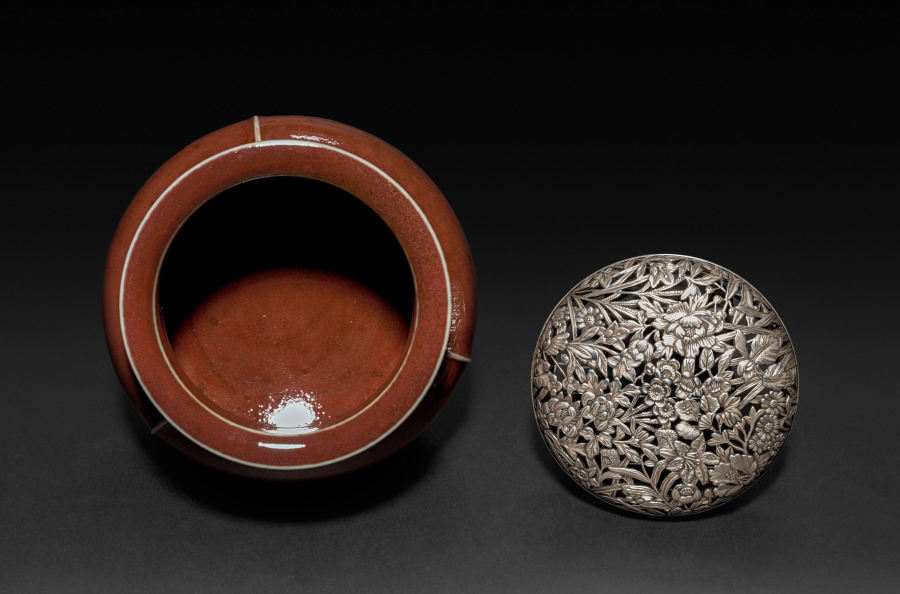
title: Incense Burner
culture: Japan, Meiji period (1868–1912)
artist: Seifū Yohei III (Japanese, 1851–1914)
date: 1893–97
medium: Porcelain with molded design, crimson glaze, and floral openwork silver lid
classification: Ceramic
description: Seifū Yohei III made incense burners in a wide variety of designs and styles. Their silver lids were produced outside the studio by metalwork specialists. This tripod incense burner has a distinctive red-colored glaze and linear molded decorations that run around the base of the collar and down the legs.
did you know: Seifū Yohei III’s incense burner with a variety of flowers on its lid has a glaze described as “crimson glaze” (kōyū); it is also dappled with dark spots of varied opacity and tiny pores throughout, which gives the container a rich, textured effect.